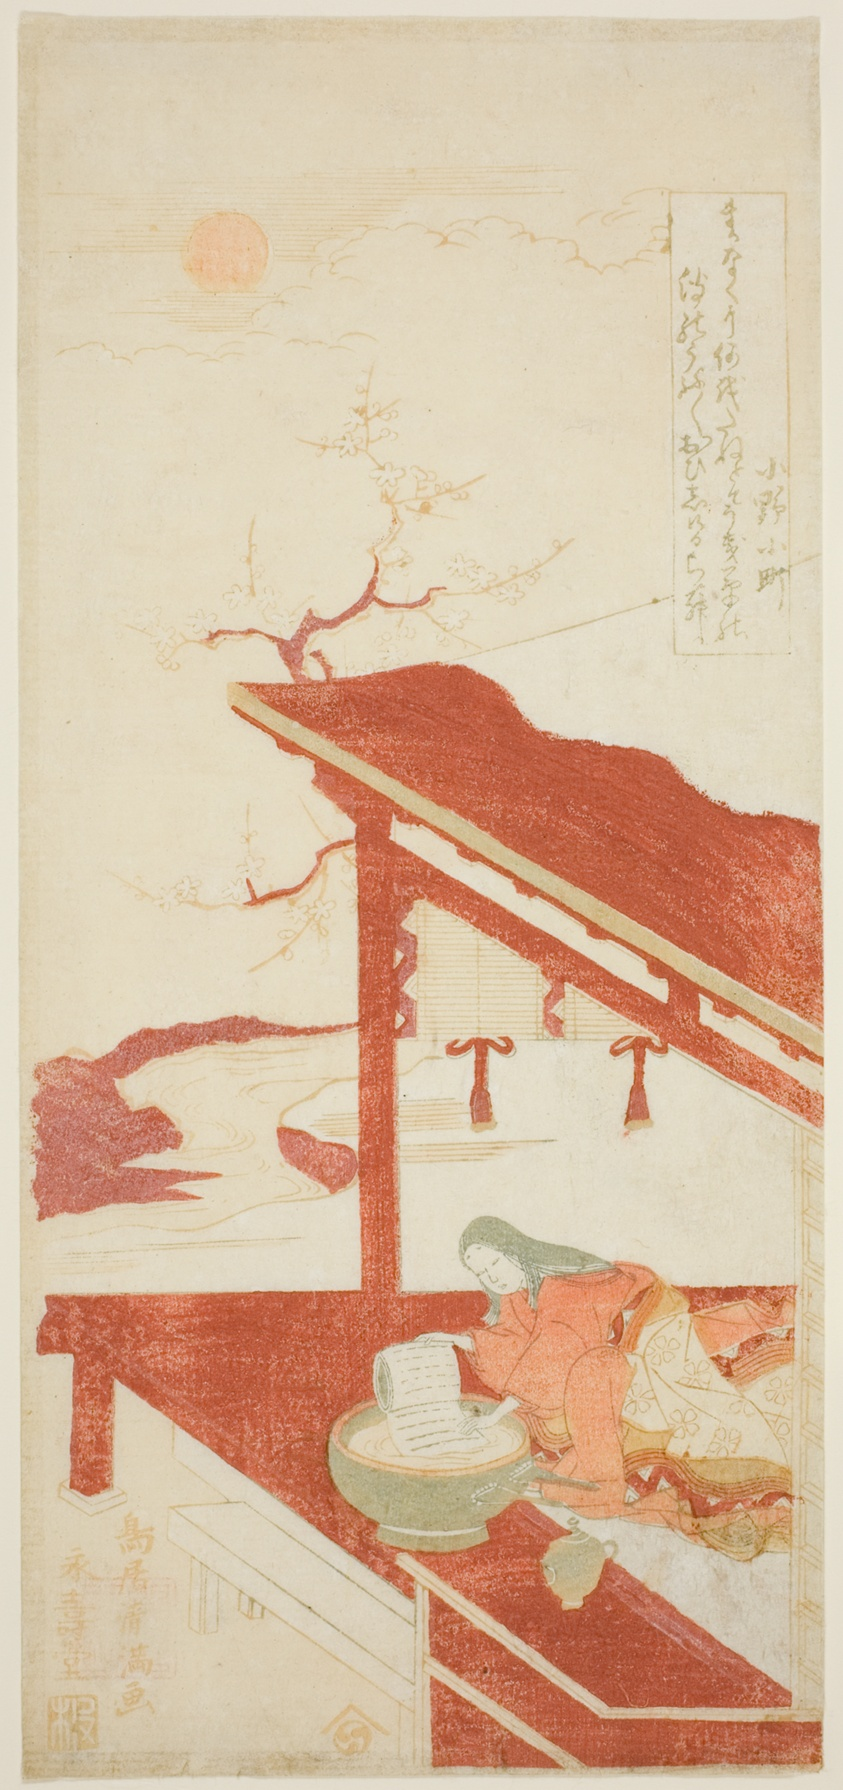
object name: Print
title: Ono no Komachi Washing the Copybook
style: Japanese (culture or style)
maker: Torii Kiyomitsu I (Japanese, 1735-1785)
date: Edo period (1615–1868), 1764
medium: Color woodblock print; hosoban, mizu-e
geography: Japan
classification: woodblock print; print; asian art